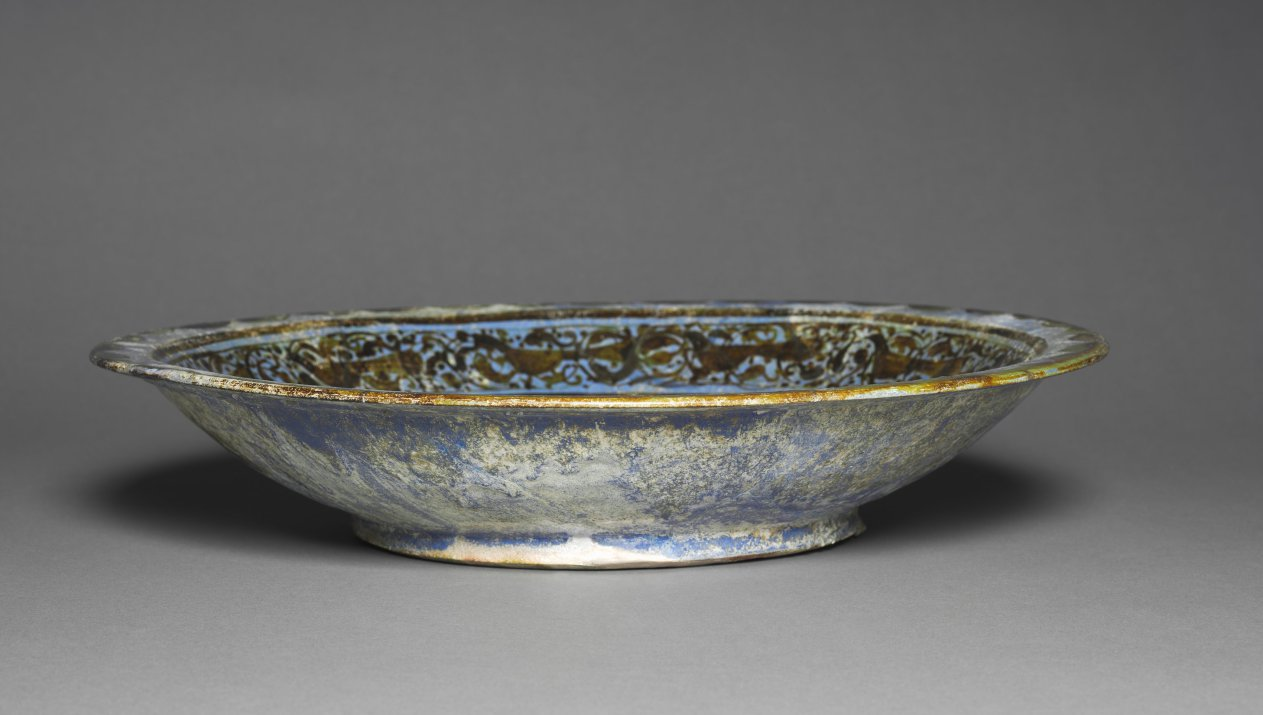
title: Luster Dish with Seated Prince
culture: Iran, Kashan, Seljuq period of Iran (1037–1194)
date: 1170–1220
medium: fritware with luster-painted design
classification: Ceramic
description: Along with Basra in Iraq and Fustat (Old Cairo) in Egypt, Kashan served as a hub of Islamic ceramic production in northern Iran. This dish was likely produced in one of its workshops and is admired for its rare blue glaze design on a luster ground. Rulers and other court officials are commonly depicted on lusterware of this period.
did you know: Around the dish's edge is a frieze of birds against an arabesque field.